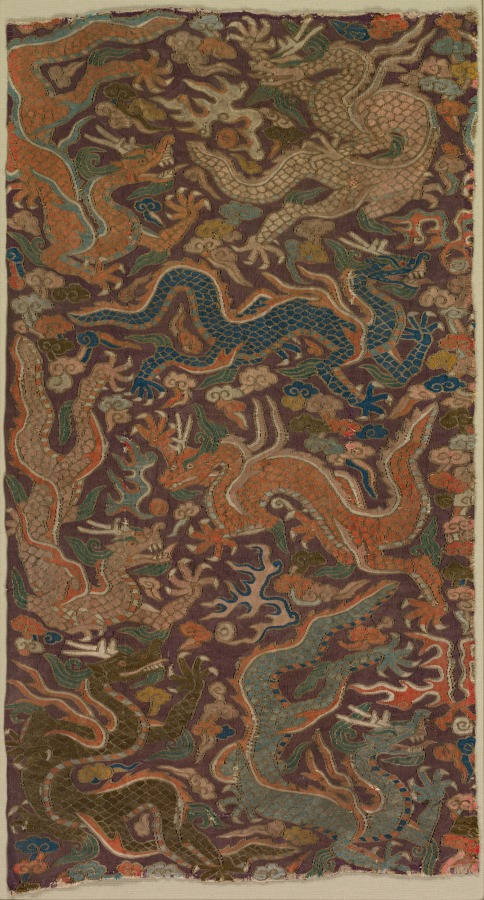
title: Dragons Chasing Flaming Pearls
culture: Central China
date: 1200s or earlier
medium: silk and gold thread: tapestry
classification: Textile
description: This rectangular, reversible tapestry (kesi) fragment, woven with silk and metal thread on a deep purple ground, is a section from yardage likely intended for a garment, but no contemporary paintings exist to confirm this. A selvage edge remains on the left; having an extant selvage edge provides us with information about the loom on which this textile was woven. The design motif of this kesi—dragons chasing flaming pearls—is Chinese. But the form of the dragons and the way they are crowded together is not Chinese. Rather than animals and birds among flowers, a frequently occurring pattern in the decorative art of eastern Central Asia that long predated the Mongol conquest, here the dragons are chasing flaming pearls. This deviation is indicative of the powerful influence of the Mongols.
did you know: The metal thread used in this weaving is fabricated from very thin strips of parchment with applied gold and silver leaf that are then wound around a core of yellow silk.